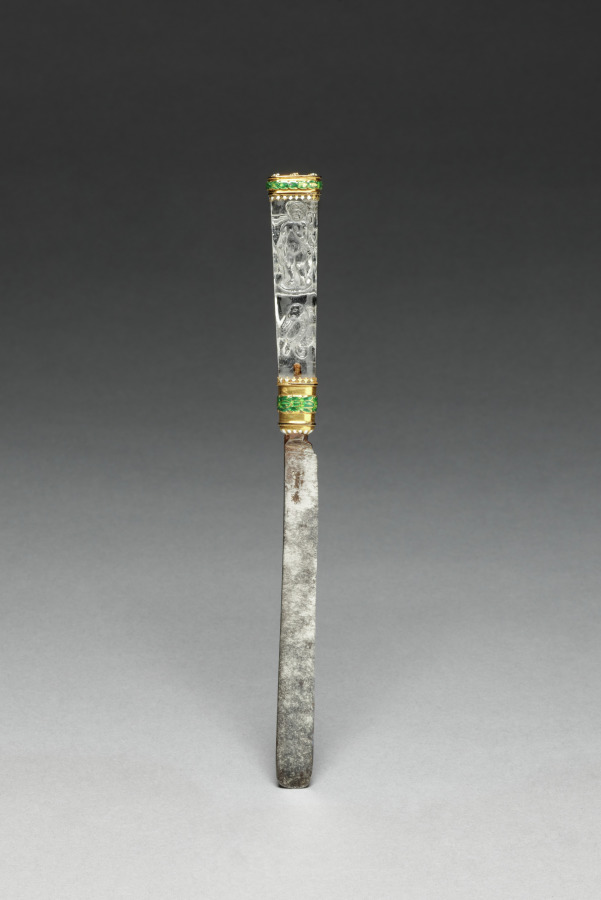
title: Knife and Fork with Sheath (Knife)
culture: Italy, Venice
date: late 1500s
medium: gold, enamel, crystal, steel, leather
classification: Enamel